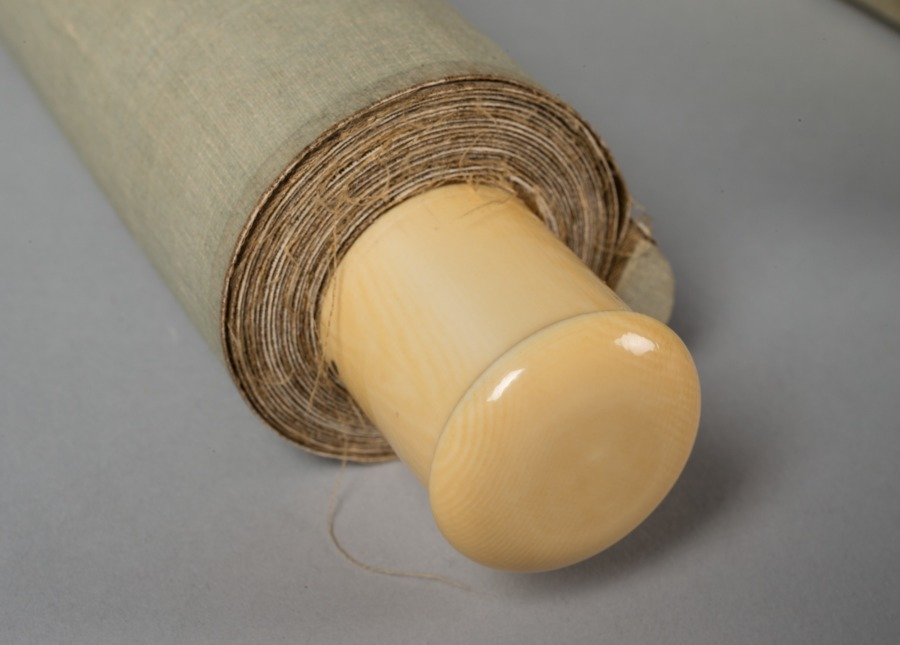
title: Happy Forest, from Water Margin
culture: Japan, Edo period (1615–1868)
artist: Matsumura Goshun (Japanese, 1752–1811)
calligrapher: and Amenomori Shōteki (Japanese, 1731–1786)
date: late 1700s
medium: hanging scroll; ink and color on paper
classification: Painting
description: The Chinese literary classic Water Margin is set in the 1120s and tells the story of 108 outlaws who first rebel against the government and then join forces with it. This painting depicts an episode in which hero Wu Song reclaims the tavern Happy Forest for its rightful owner, the prison warden’s son, Shi En. To prepare for the fight, Wu Song drinks a lot of wine. The painting was inscribed with a quote in which an ally describes Wu Song’s fighting style. It reads as follows: Where his twin fists rise, clouds and thunder roar, When his flying kick comes, wind and rain tremble.